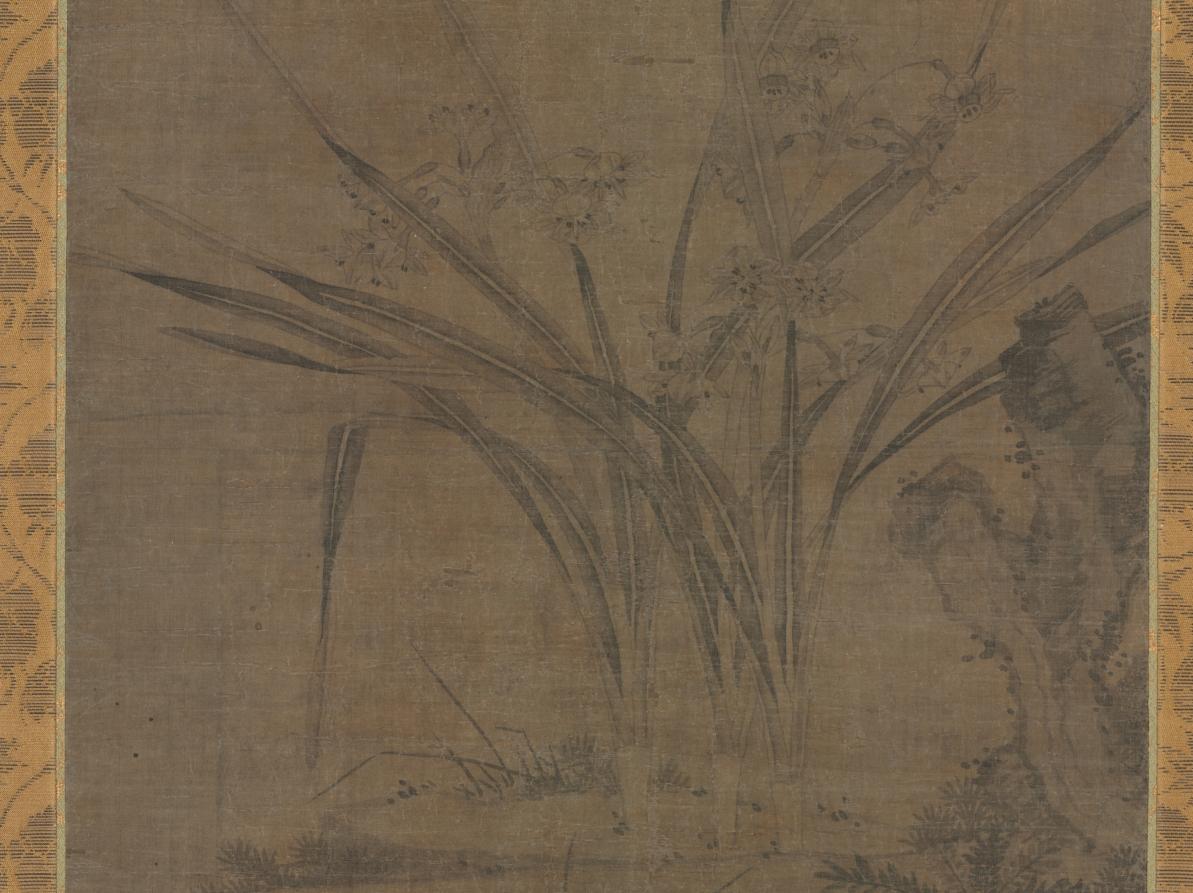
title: Narcissus and Rocks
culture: China, Ming dynasty (1368–1644)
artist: Lu Tianru (Chinese, first half of 1400s)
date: 1368–1644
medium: hanging scroll, ink on silk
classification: Painting